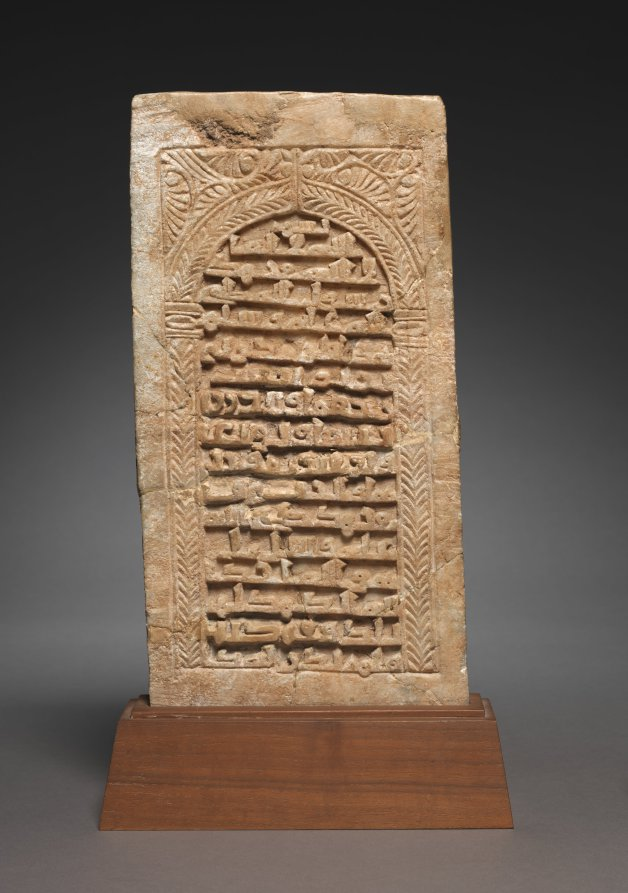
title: Tombstone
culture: Iran, Nishapur, 10th century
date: 900s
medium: limestone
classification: Sculpture